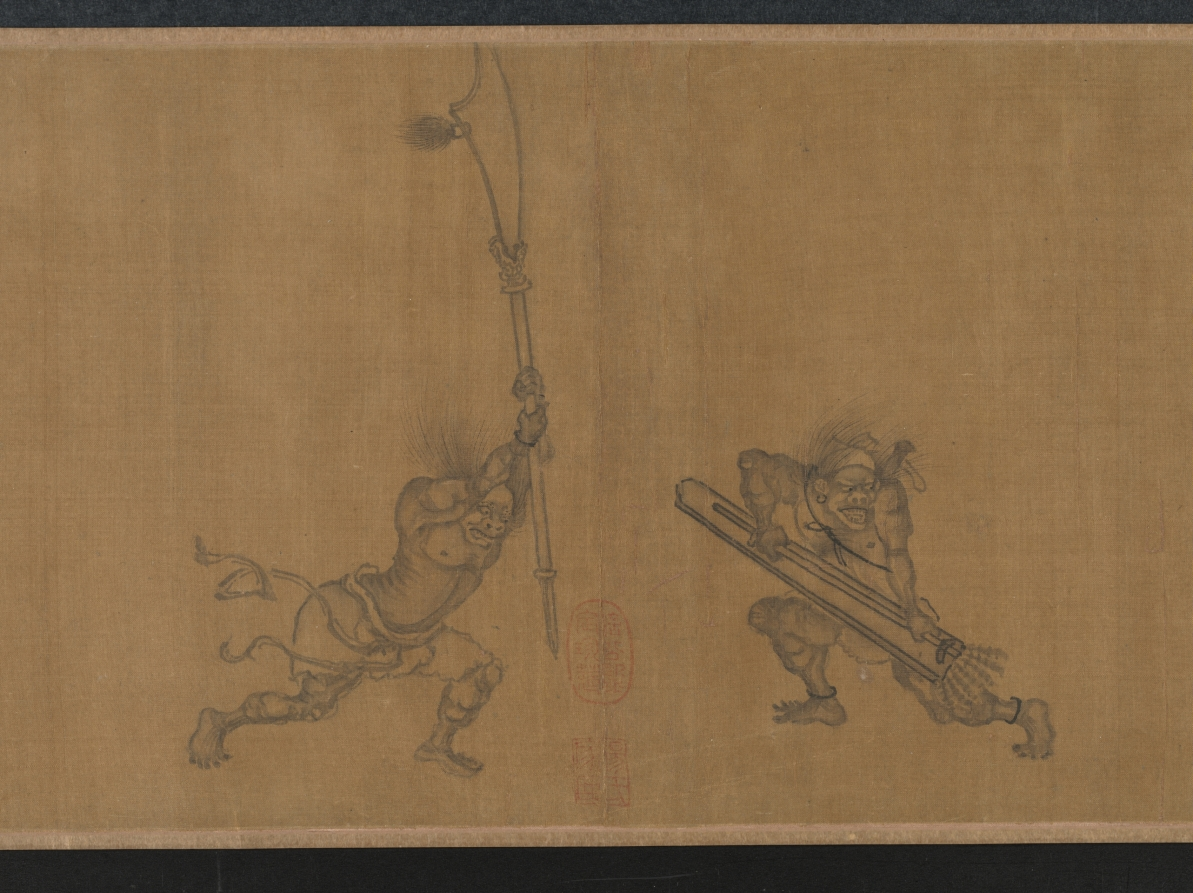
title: The Lantern Night Excursion of Zhong Kui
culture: China, Yuan dynasty (1271-1368)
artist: Yan Hui (Chinese, active 1270–1310)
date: late 1200s–early 1300s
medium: handscroll; ink and slight color on silk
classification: Painting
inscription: Artist's signature [and probable seal]: Yan Qiuyue 顏秋月 Title on frontispiece and 1 seal of Niu Shuyu 鈕樹玉 (1760–1827): Qiuyue mohuan 秋月墨幻 [Qiuyue's Ink Fantasy]. 31 additional seals: 2 of Yang Shiqi 楊士奇 (1365–1444); 2 of An Guo 安國 (1481–1534); 8 of Xiang Yuanbian 項元汴 (1525–1590); 2 of Geng Zhaozhong 耿昭忠 (1640–1686); 4 of Pu Tung 溥侗 (1870–1952); 7 of Tan Jing 譚敬 (1911–1991); 1 of Liu Ting-chih (20th c.); 5 unidentified.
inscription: An inscription by Zizhi Shanren 紫芝山人 [probably Jiang Hui 蔣惠], dated 1389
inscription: An inscription by Wu Kuan 吳寬 (1436–1504)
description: Here, the demon queller Zhong Kui leads a nightly procession of street entertainers with bare, muscular bodies and demonic faces. Some wear shabby clothes, and all perform stunts and tricks to astound and scare the viewer. In fact, a New Year custom in cities of southeast China had the poor, disguised as demons, process through the streets and play their tricks to clear households of evil spirits and welcome the spring. From right to left, a demonic figure leads the procession and beats a drum; another lifts a large rock; one stands on his hands trying to drink; one balances a jar on his elbow; three hold and wield weapons; one carries a folded chair covered by a cow’s skin; another holds Zhong Kui’s qin (zither), books, brush, and inkstone. At the end of the scroll, two figures offer a cup and bottle of wine to Zhong Kui, who lifts his hand in command.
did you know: Zhong Kui was an ancient ghostbuster.